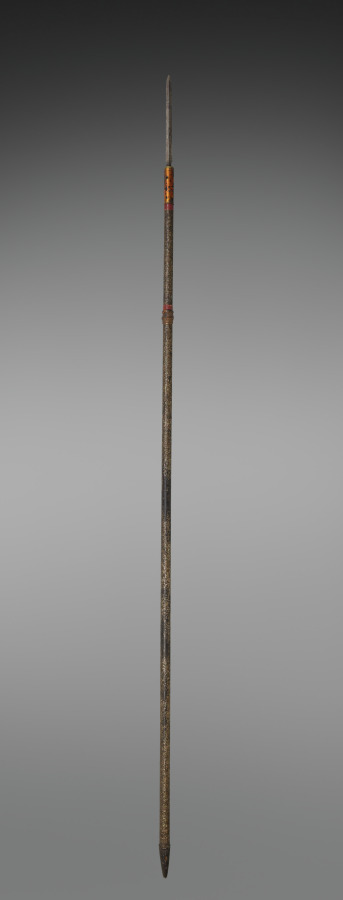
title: Spear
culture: Japan, Edo period (1615–1868)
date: 1700s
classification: Arms and Armor